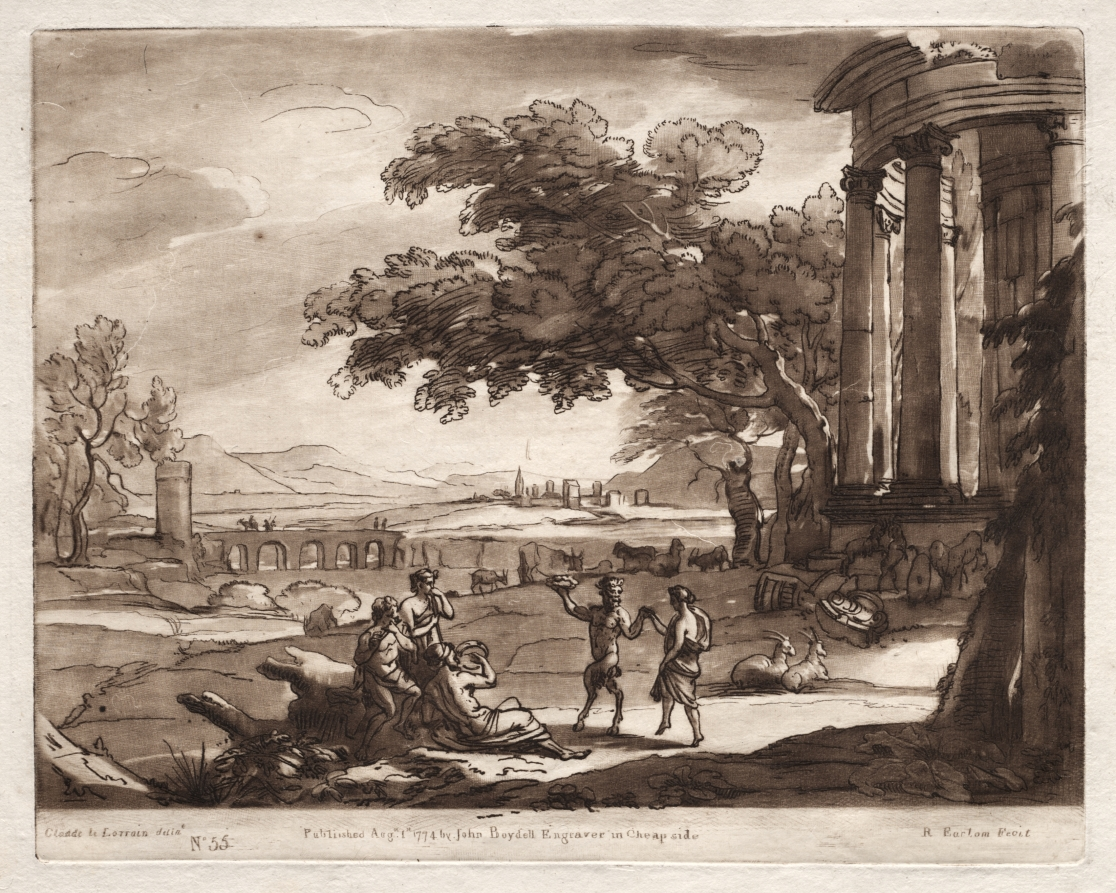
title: Liber Veritatis: No. 55, A Landscape with a Temple and a Nymph and Satyr Dancing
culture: England, 18th century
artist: Richard Earlom (British, 1743–1822)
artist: after Claude Lorrain (French, 1604–1682)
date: 1774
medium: etching and mezzotint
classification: Print